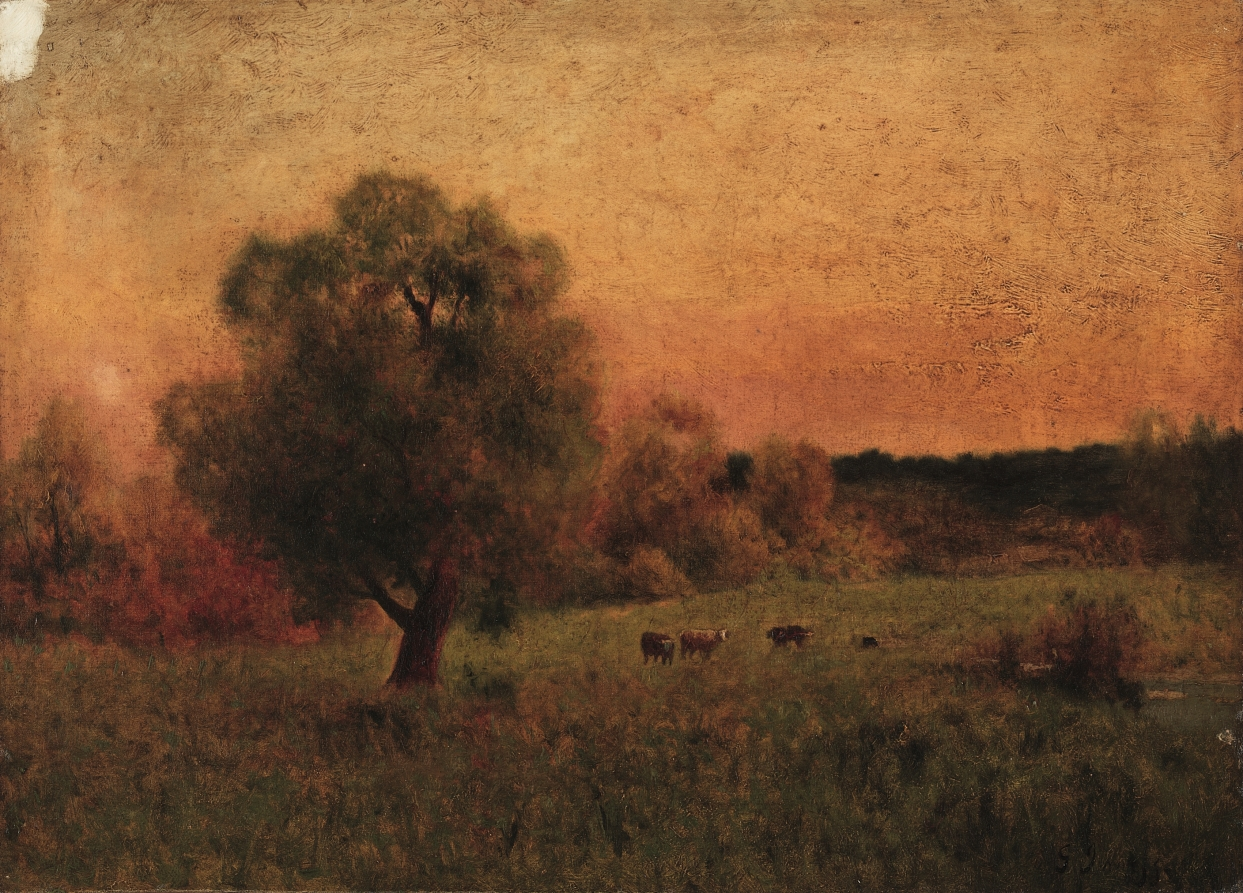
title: Cows in a Field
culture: America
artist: imitator of George Inness (American, 1825–1894)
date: before 1956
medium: oil on canvas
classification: Painting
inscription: lower right: G. Inness